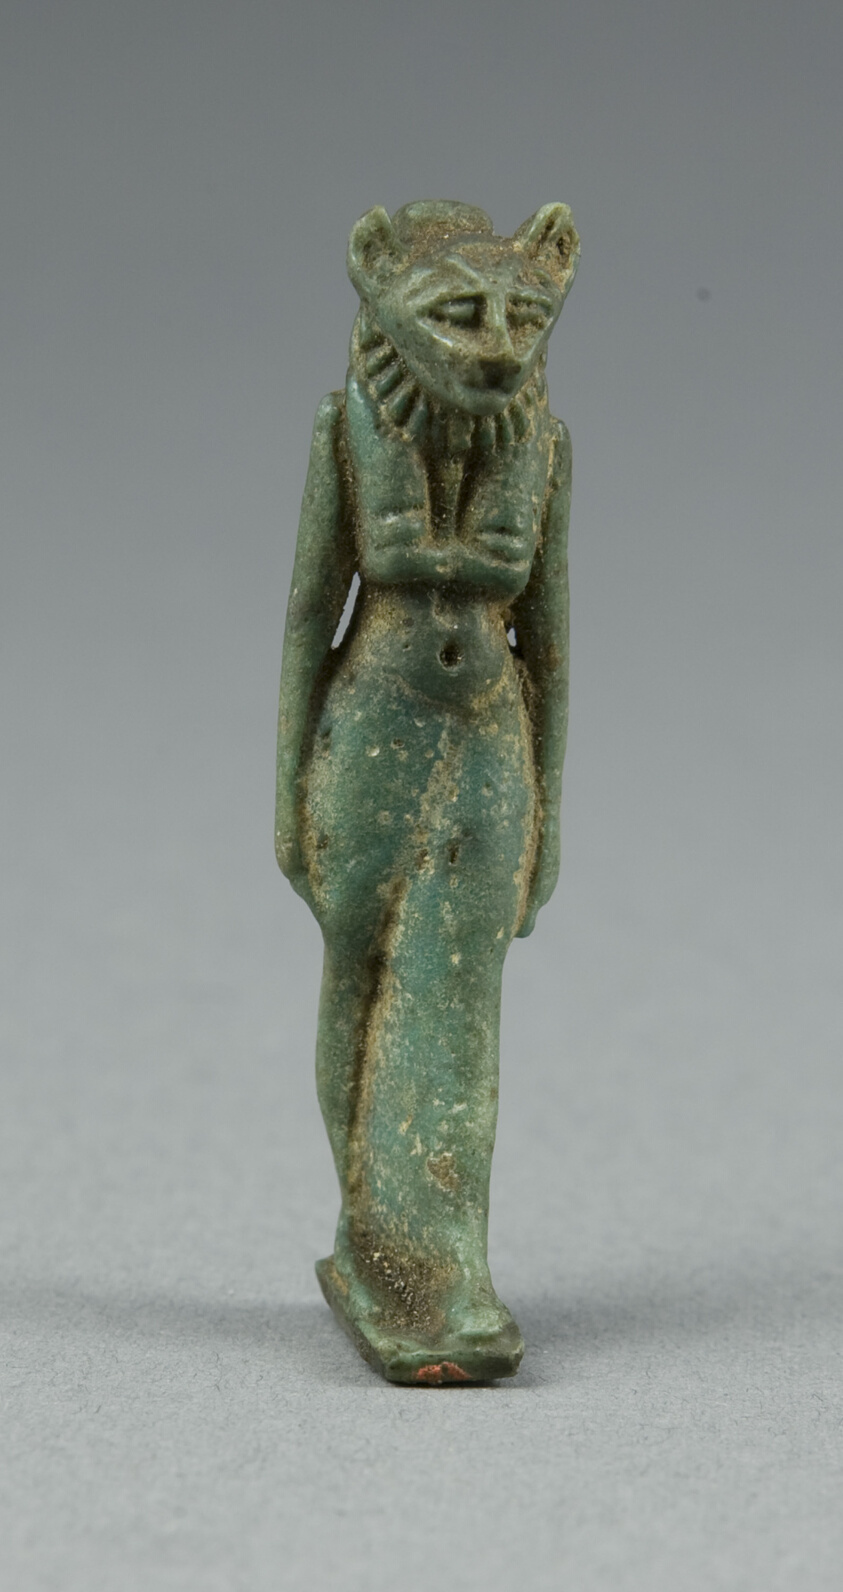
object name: Costume and Accessories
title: Amulet of a Lion-headed Walking Goddess, possibly Bastet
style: egyptian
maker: Egyptian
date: Third Intermediate Period, Dynasties 21–25 (about 1069–664 BCE)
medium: Faience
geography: Egypt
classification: amulet; jewelry; ceramics; ancient art; costume; faïence (composite material)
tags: goddesses